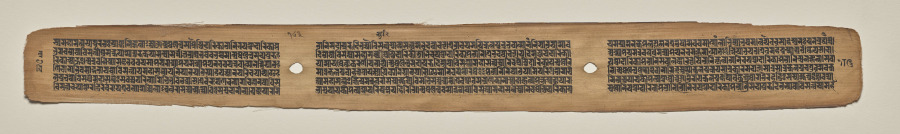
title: Text, folio 183 (verso), from a Manuscript of the Perfection of Wisdom in Eight Thousand Lines (Ashtasahasrika Prajnaparamita-sutra)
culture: Eastern India, Bihar, Vikramashila Monastery. Painting: Nepal, Kathmandu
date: Sunday, September 14, 1119 (year 239 of the Newar Samvat in the month of Ashvina)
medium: gum tempera and ink on palm leaves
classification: Painting